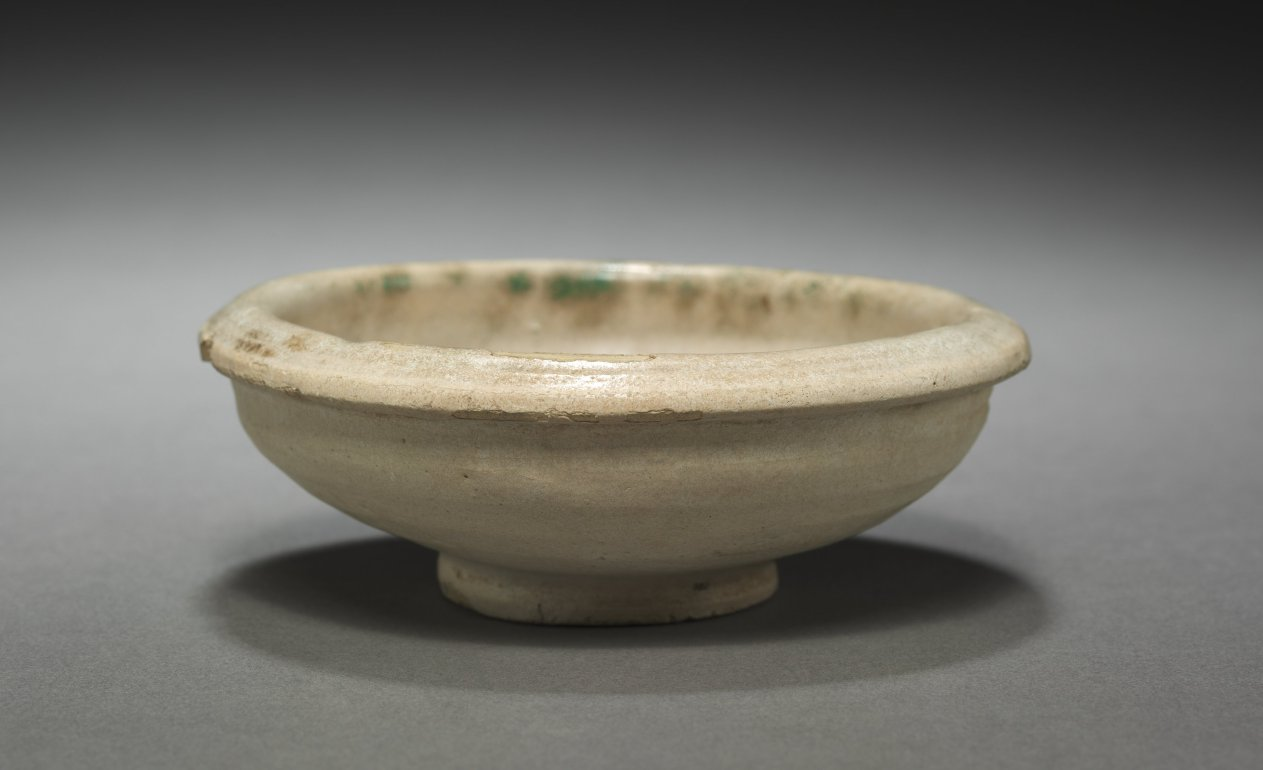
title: Small Bowl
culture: Parthian Empire (247 BCE–224 CE)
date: 1–200 CE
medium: terracotta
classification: Ceramic